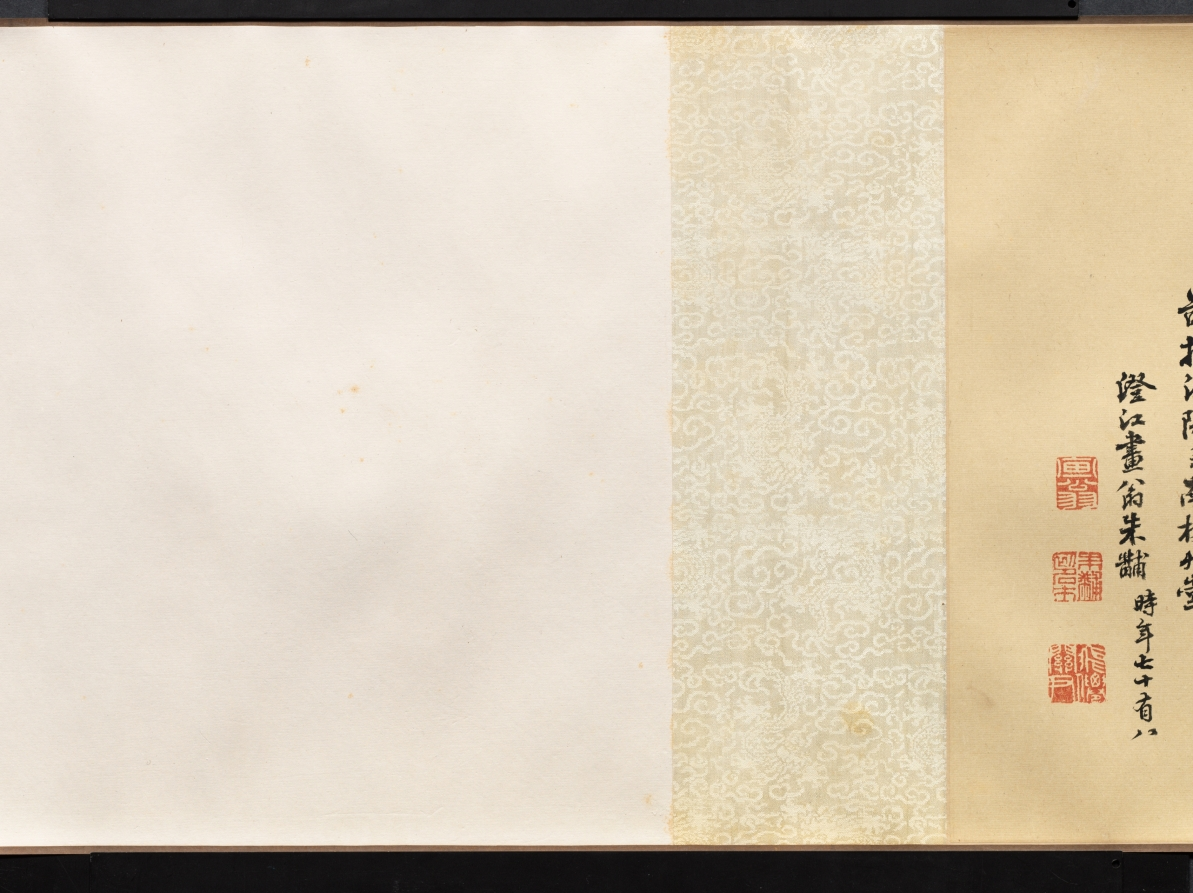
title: Landscape, The Palace of the Clouds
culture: China, Qing dynasty (1644-1911)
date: 1644–1911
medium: handscroll, ink on silk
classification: Painting